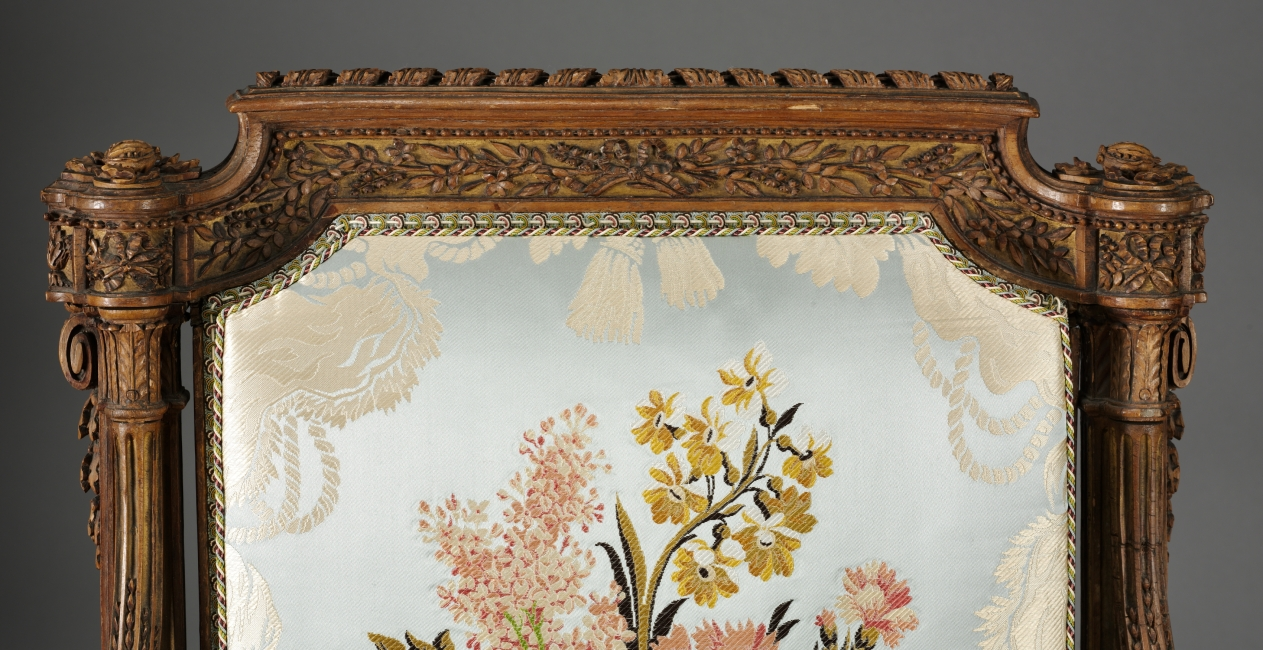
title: Armchair (Fauteuil) (1 of 2)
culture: France, 18th century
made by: Nicolas-Denis Delaisement (French)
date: c. 1785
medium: boxwood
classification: Furniture and woodwork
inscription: signed on back of frame of seat underneath: Delaisement with inverted "s."